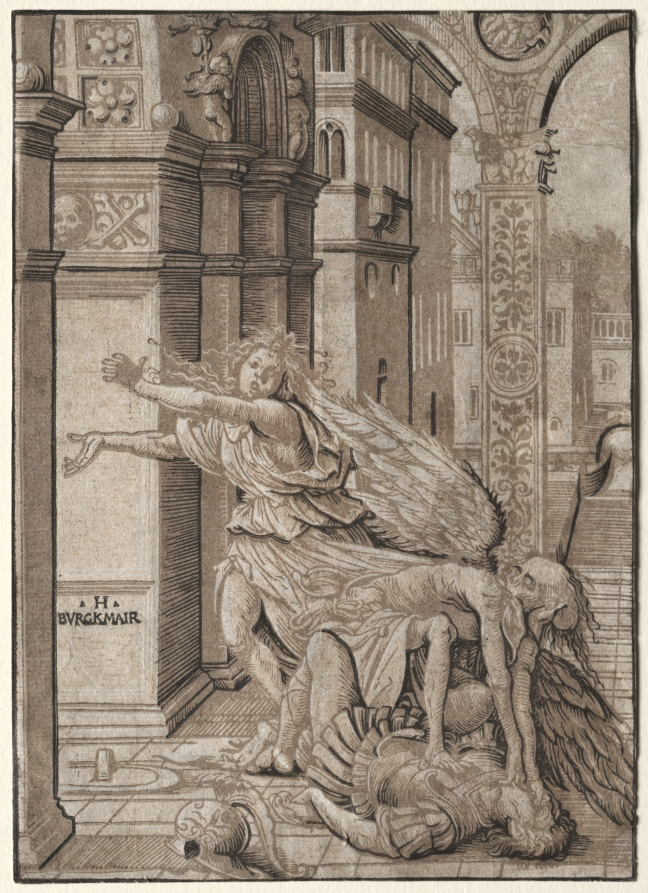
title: The Lovers Surprised by Death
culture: Germany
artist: Hans Burgkmair (German, 1473–1531)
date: 1510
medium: chiaroscuro woodcut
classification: Print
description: This is the earliest known chiaroscuro woodcut to be composed of a line block and two tone blocks rather than just one tone block. However, unlike the majority of German chiaroscuro woodcuts, the line block alone does not provide a coherent image. All three of the blocks must be printed for the design to be complete. The subject is a remarkably effective combination of a typically Northern subject—a grim representation of Death—and an evocative Italian setting. The classical architecture, the gondola on a canal, and the distinctively wide chimney pots indicate Venice, where Burgkmair would have stayed during his presumed journey to Italy in 1507. The figure of Death is winged, as in Italian art of the period, and the classical costumes and pose of the terrified woman resemble antique representations of Daphne fleeing Apollo, a reflection of what interested Burgkmair's patrons, the educated elite in Augsburg.